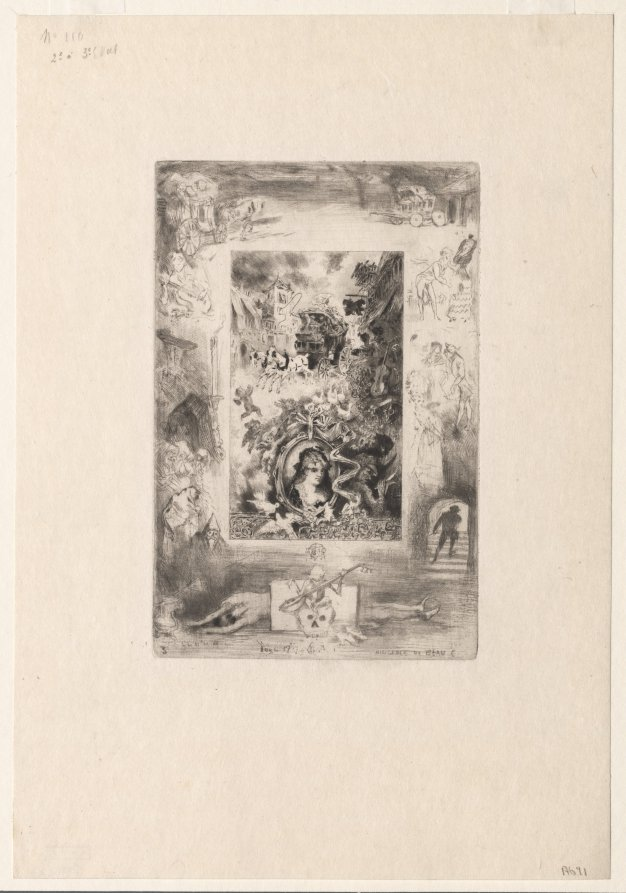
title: Letters from My Windmill:The Diligence of Beaucaire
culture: France, 19th century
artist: Félix Hilaire Buhot (French, 1847–1898)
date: 1880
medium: drypoint, roulette and aquatint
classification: Print